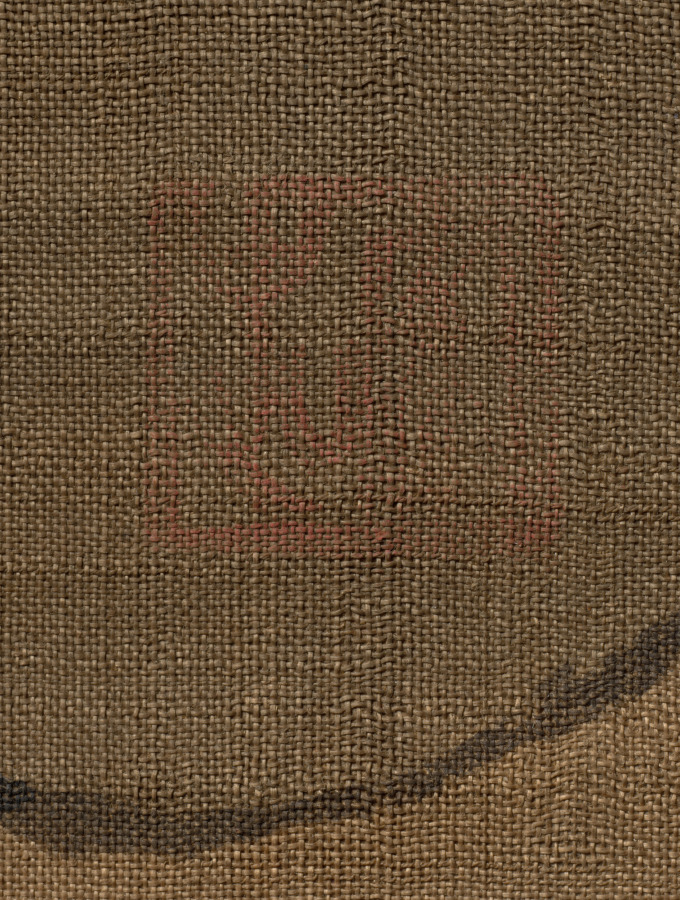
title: Landscape with Fishermen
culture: Korea, Joseon dynasty (1392–1910)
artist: attributed to Yi Bul-hae (Korean, active 1500s)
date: 1600s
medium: hanging scroll; ink and slight color on silk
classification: Painting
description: Clad in a straw rain poncho and wide-brimmed hat, a fisherman is seated in a small boat. Reeds sparkle on the far shoreline among dark, black rock forms that appear to float above the water. On the near shoreline are a pair of pines, a grove of bamboo or water reeds, and two withered deciduous trees from which moss hangs. This landscape painting, which emphasizes an intimate solitary moment through evoking various atmospheric elements—rain, evening light, and frosty air—was one of the main subjects of mid- and late 16th-century landscape paintings.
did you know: This landscape painting emphasizes an intimate solitary moment by evoking various atmospheric elements: rain, evening light, and frosty air.